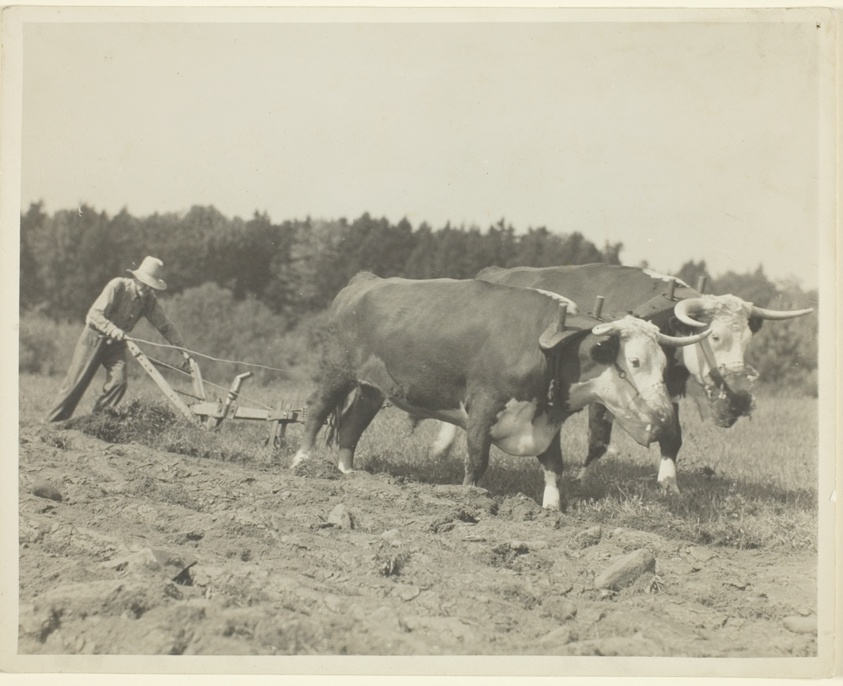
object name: Photograph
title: Rural Scene In Central Maine, Many Oxen Are Still Used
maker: Lewis Wickes Hine (American, 1874–1940)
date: 1930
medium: Gelatin silver print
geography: United States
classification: gelatin silver (developing-out-paper) pr; photographic process; photography; photograph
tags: Collected by Hugh Edwards